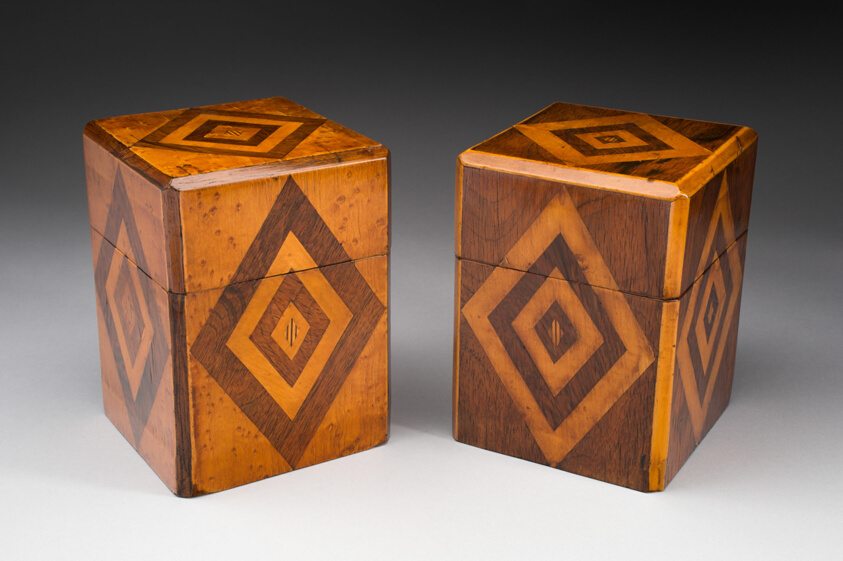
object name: Decorative Arts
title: Pair of Tea Caddies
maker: Artist unknown (American, 19th century)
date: 1800–50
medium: Maple, rosewood, and white pine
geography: United States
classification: wood; container; american decorative arts; american arts; decorative arts